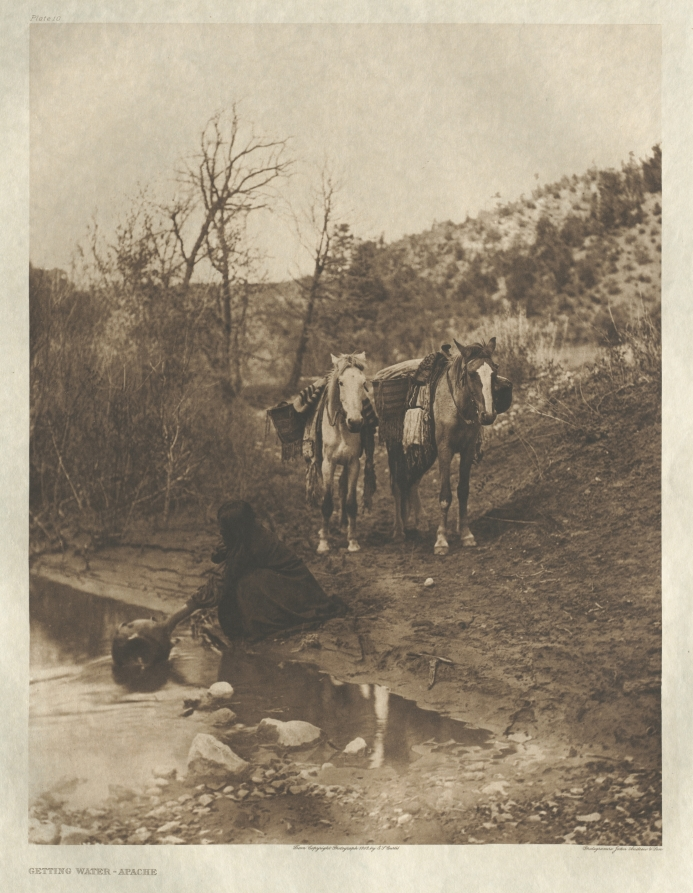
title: Portfolio I, Plate 10: Getting Water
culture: America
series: The North American Indian: being a series of Portfolios picturing and describing the Indians of the United States, the Dominion of Canada, and Alaska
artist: Edward S. Curtis (American, 1868–1952)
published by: The University Press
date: 1903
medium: photogravure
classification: Portfolio